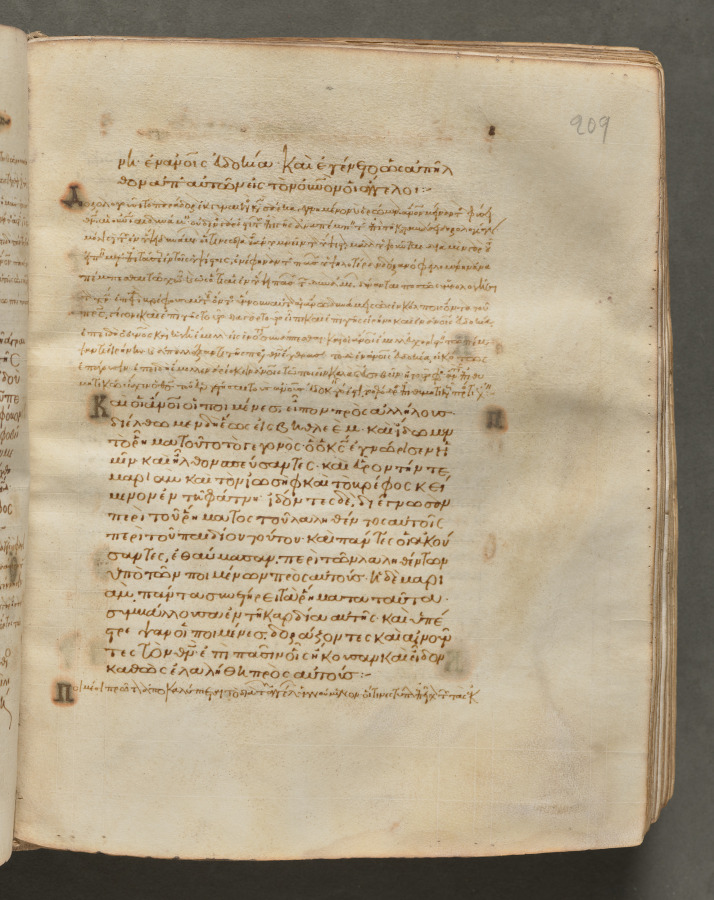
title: Text, folio 209 (recto), from a Gospel Book with Commentaries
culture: Byzantium, Constantinople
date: c. 1000–1100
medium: ink, tempera, and gold on vellum; leather binding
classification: Bound Volume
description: Each of the four gospels in this book opens on a page with brilliantly illuminated borders depicting the author of the text as well as birds-principally peacocks, symbols of the immortality of the soul-and fountains, representing the fountain of life and the salvation of the soul. This volume consists of 428 leaves with texts in Greek. Its level of sophistication suggests that it was probably written and decorated in a monastery in Constantinople.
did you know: Gospel Books were carried in procession through Byzantine churches.